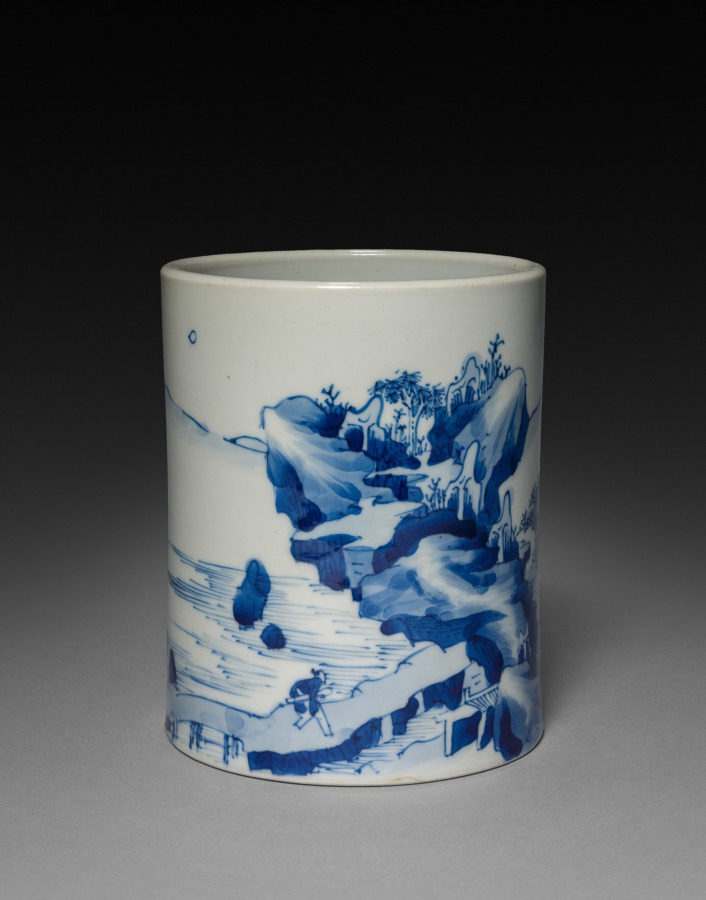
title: Brush Pot with Landscape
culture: China, Jiangxi province, Jingdezhen kilns, Qing dynasty (1644-1911), Kangxi reign (1662-1722)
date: 1662–1722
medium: porcelain with underglaze blue decoration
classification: Ceramic